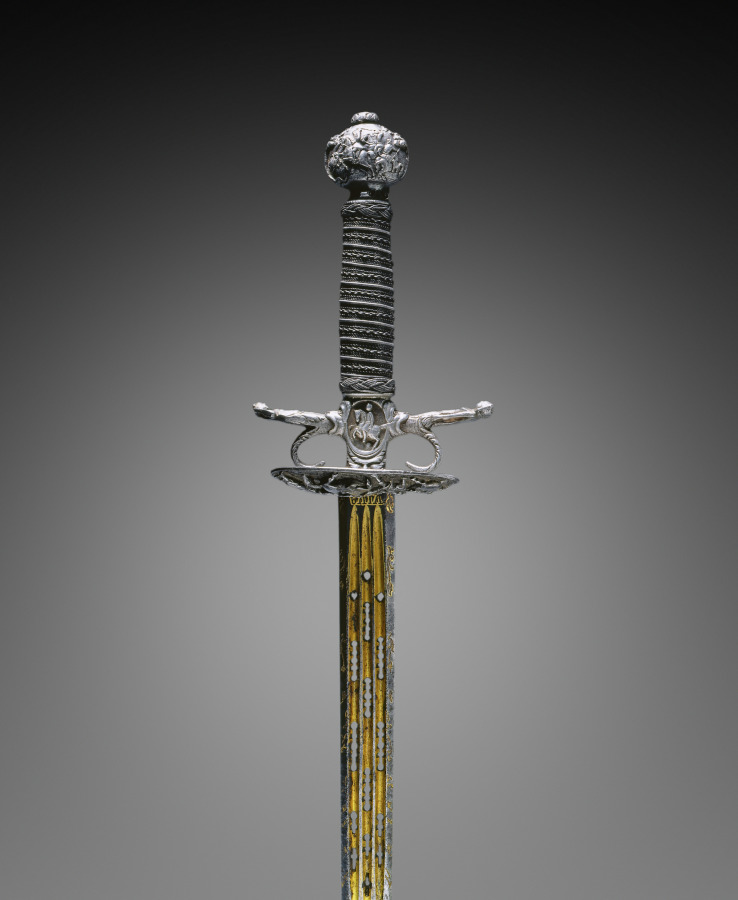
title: Small Sword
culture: hilt: Holland; blade: Spain, 17th century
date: c. 1650–60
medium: Blued, gilded, and pierced steel, wood, steel wire, chiseled shell guard, engraved blade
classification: Arms and Armor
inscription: inscribed on ricasso: VIVA RE DI NAPOLI